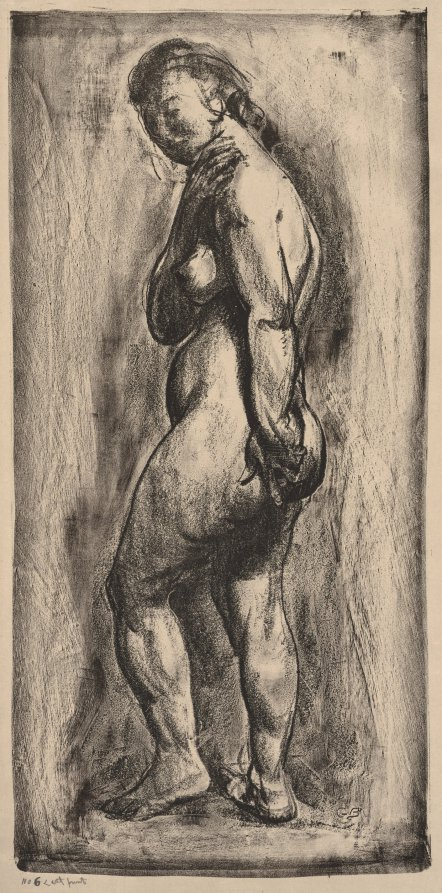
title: Nude Woman Standing, Side View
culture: America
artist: George Bellows (American, 1882–1925)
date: 1916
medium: lithograph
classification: Print